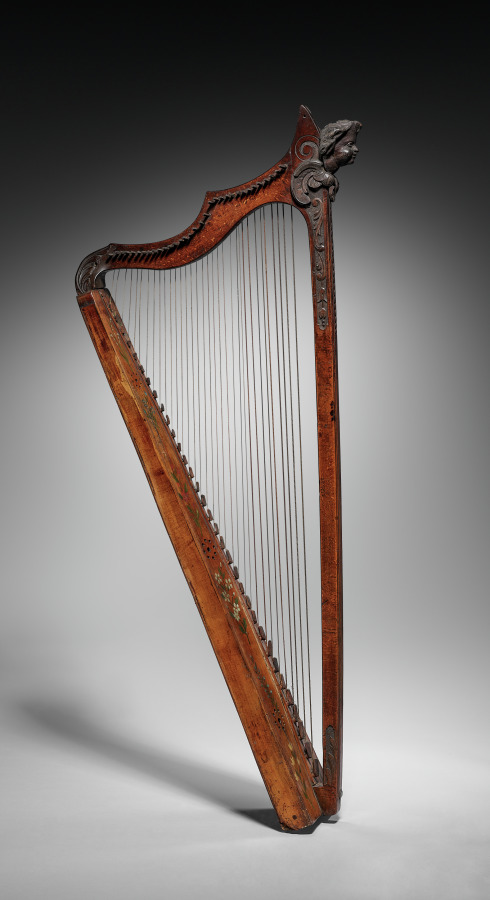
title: Harp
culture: France, 16th century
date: 1500s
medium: wood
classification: Musical Instrument